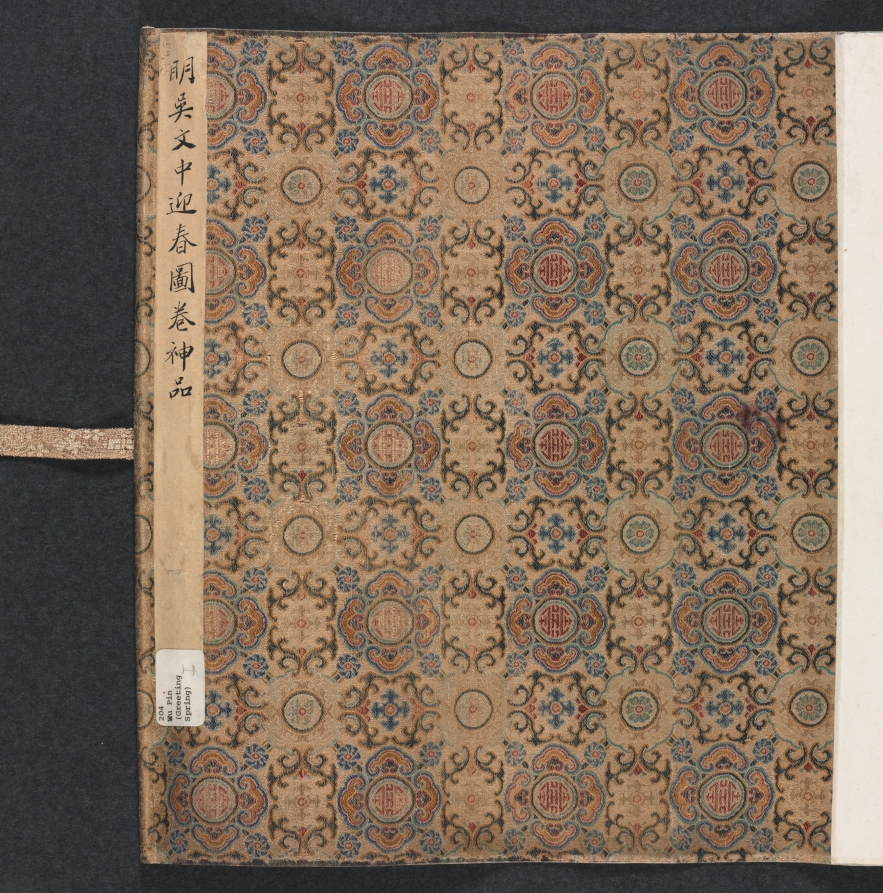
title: Greeting the Spring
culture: China, Ming dynasty (1368–1644)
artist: Wu Bin (Chinese, active c. 1591–1626)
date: 1600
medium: handscroll; ink and light color on paper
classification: Painting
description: This masterfully composed landscape in light colors and delicate brushwork is an image of the water-rich Jiangnan region in southeast China, where Wu Bin was active as an artist. Embedded in rolling hills along lakesides and streams nestle cityscapes hosting numerous spring festivities. Lantern displays and street performances in the villages salute the New Year, and are interwoven with scenes of farming, fishing, and silk making. In one scene in the middle ground, an ox made of clay under a canopy is lead in a procession to an architectural compound, a ceremony known as whipping the spring ox in hope for a good harvest. This handscroll bears five collector seals by the Qianlong emperor indicating his appreciation for the painting.